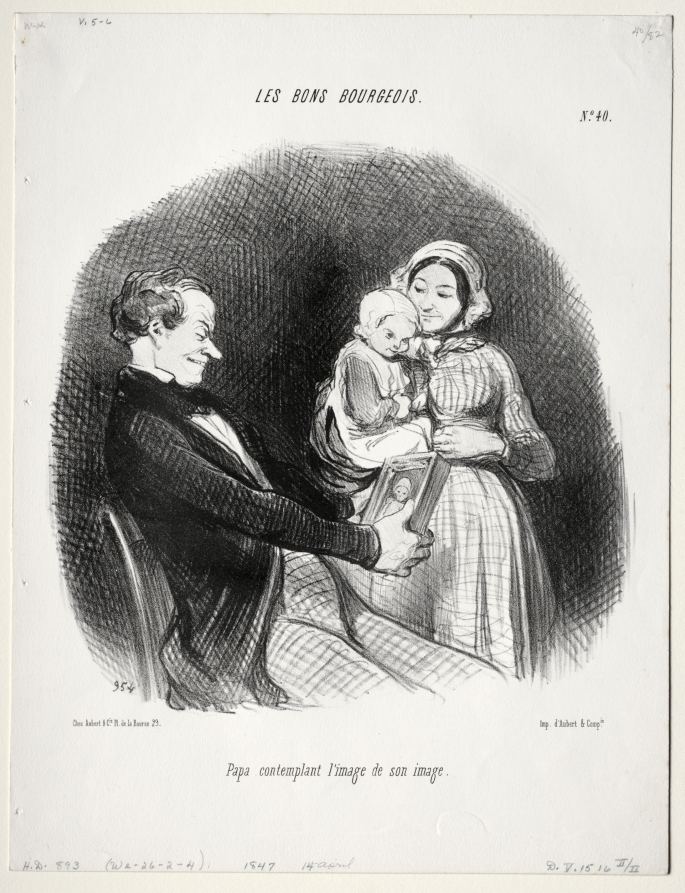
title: Papa contemplates a likeness of his likeness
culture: France, 19th century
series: The Good Bourgeois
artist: Honoré Daumier (French, 1808–1879)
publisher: Aubert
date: 1847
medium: lithograph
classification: Print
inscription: Above image, printed: LES BONS BOURGEOIS. / NO. 40. ; below image, printed: Papa contemplant l'image de son image.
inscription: Upper, margin, pencil: W-K V. 5-6 / 40/82 ; lower margin, printed: Chez Aubert & Cie. Pl. de la Bourse, 29. / Imp. d'Aubert & Comp.ie ; lower margin, in pencil: H.D. 893 / (We-26-02-4) / 1847 14 April / D.V.1516 II/II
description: This print was published in Le Charivari (April 14, 1847) as plate 40 from the series The Good Bourgeois.